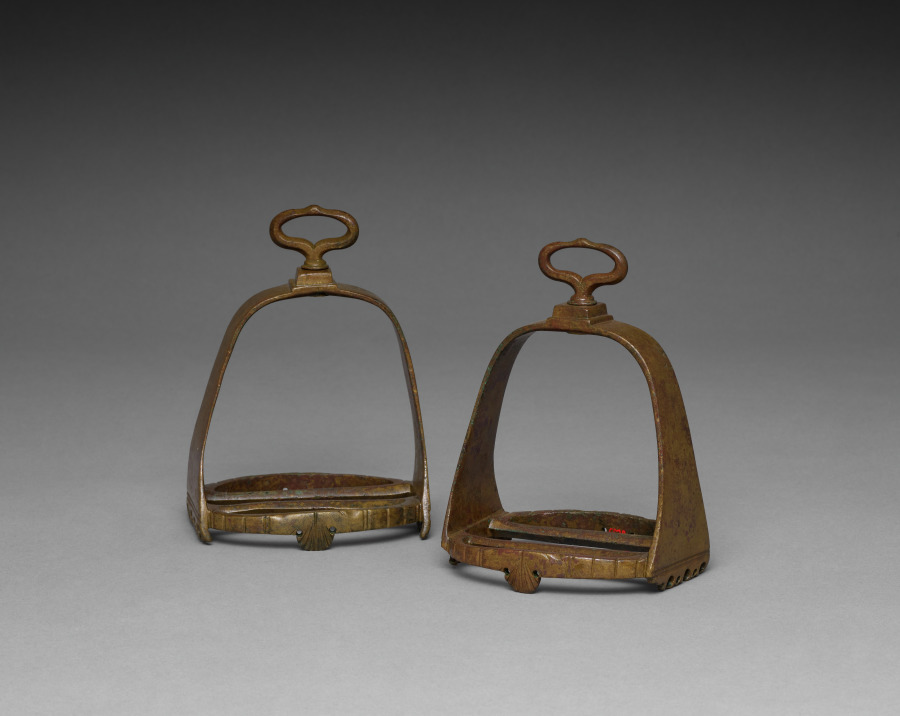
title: Pair of Stirrups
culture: England (?), 17th century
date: 1600s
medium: brass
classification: Arms and Armor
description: With the aid of stirrups, the knight could rise (especially during jousts) and, buttressed against the high cantle of the saddle, bend forward in order to gain the full advantage of the weight of his own armor and that of his horse. The footplate of the stirrup gradually became wider, as shown by these examples from the 1600s.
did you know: Although more fragile than non-rotating systems, the swivel suspension eye allowed the stirrup leather to stay flat against the horse’s flank when it was in use.